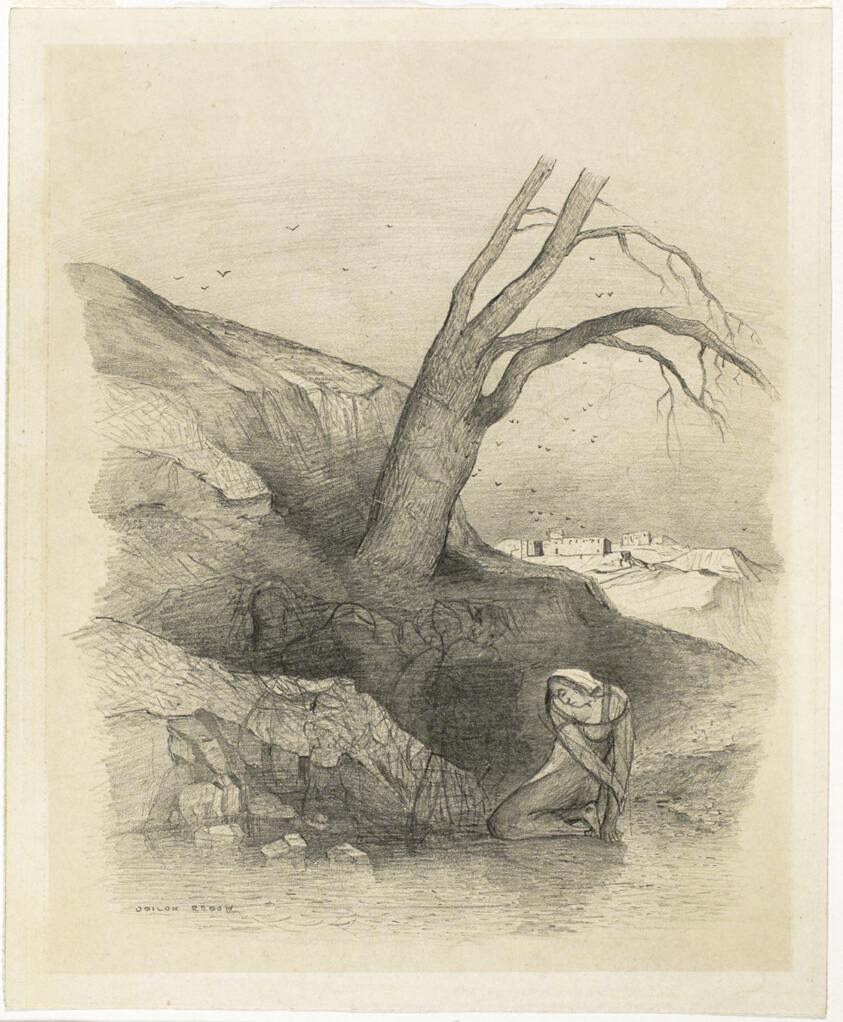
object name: Drawing and Watercolor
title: Woman Kneeling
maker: Odilon Redon (French, 1840-1916)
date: c. 1868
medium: Graphite on cream wove paper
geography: France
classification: graphite; drawings (visual works); prints and drawing; paper